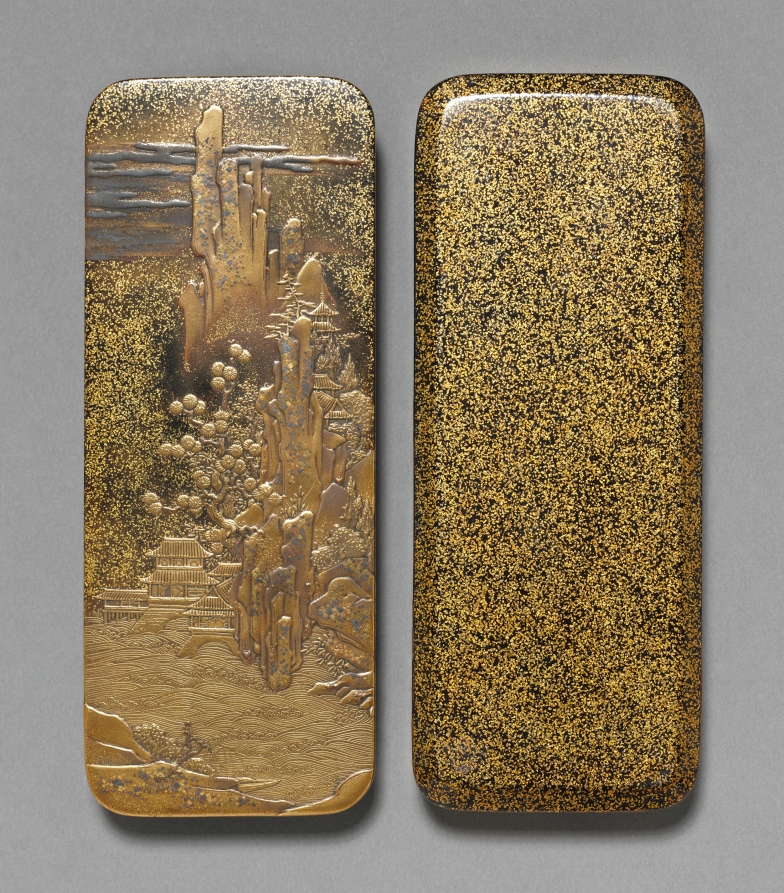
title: Box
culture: Japan, Edo period (1615–1868)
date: 1800s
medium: lacquer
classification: Lacquer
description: For the cover designs on writing boxes, Chinese motifs like Mt. Penglai (Horai-zan in Japanese), the island of immortality, remained popular. A landscape with a river, buildings, mountains, trees, and clouds decorates the top of this portable writing box while the inside is embellished with clouds, birds, water, and grasses and offers a space for a tiny ink stone.